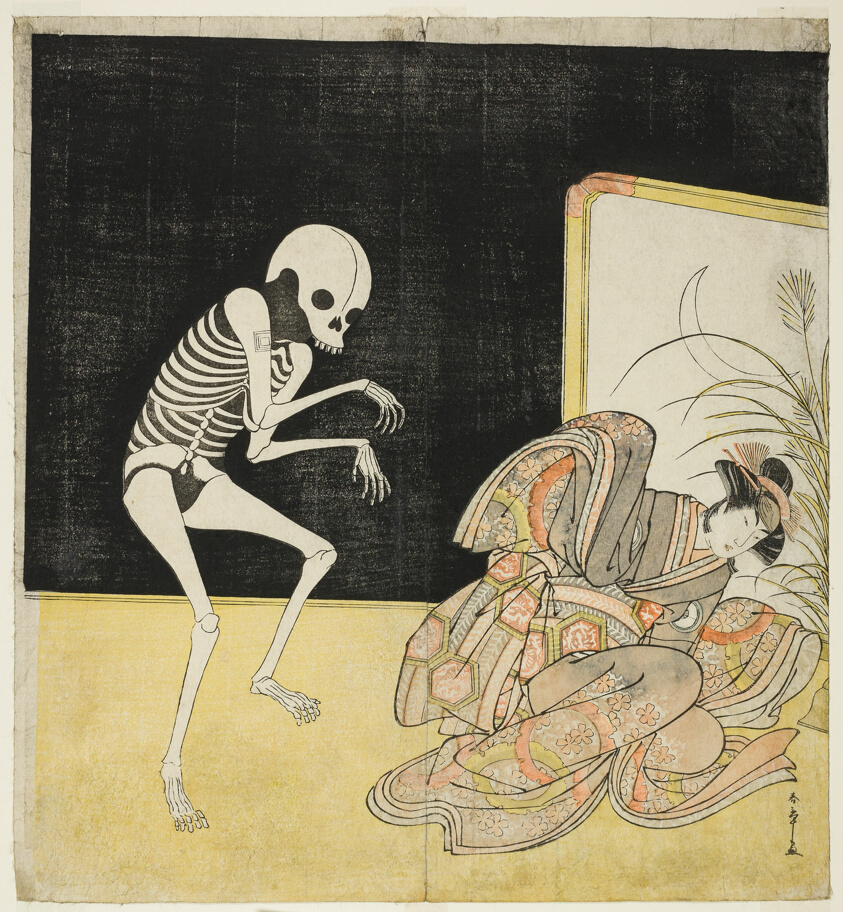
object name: Print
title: Ichikawa Danjūrō V as a Skeleton, Spirit of the Renegade Monk Seigen, and Iwai Hanshirō IV as the Cherry Princess, in “Flower of Edo: An Ichikawa Saga” (Edo no Hana Mimasu Soga)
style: Japanese (culture or style)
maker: Katsukawa Shunsho 勝川 春章 (Japanese, 1726-1792)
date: c.1783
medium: Color woodblock print; hosoban diptych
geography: Japan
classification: woodblock print; print; asian art